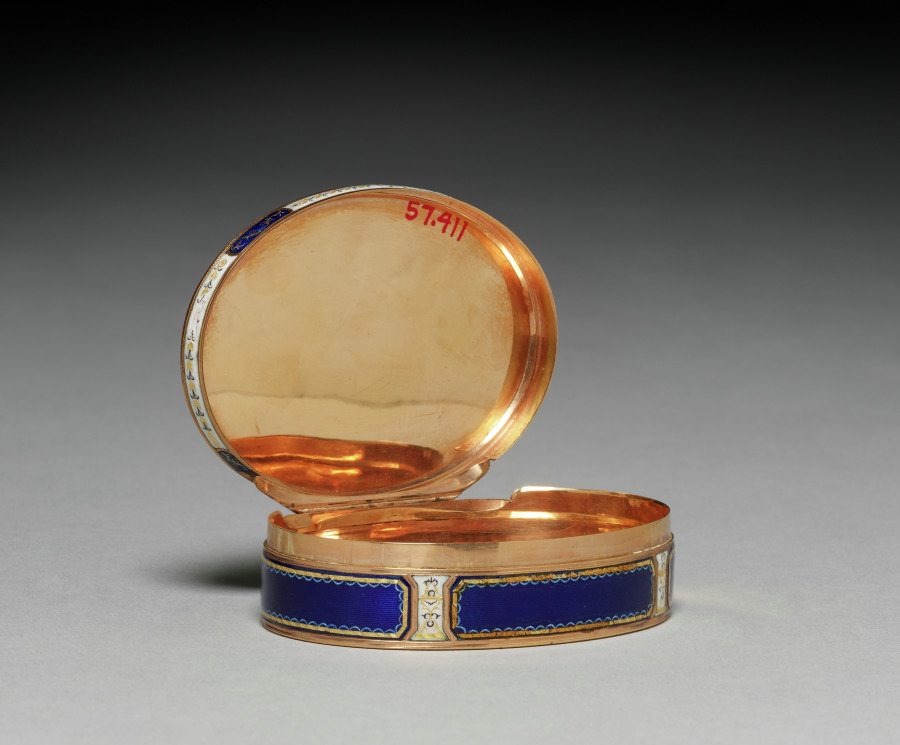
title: Box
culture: Switzerland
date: late 1700s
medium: gold and enamel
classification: Miscellaneous